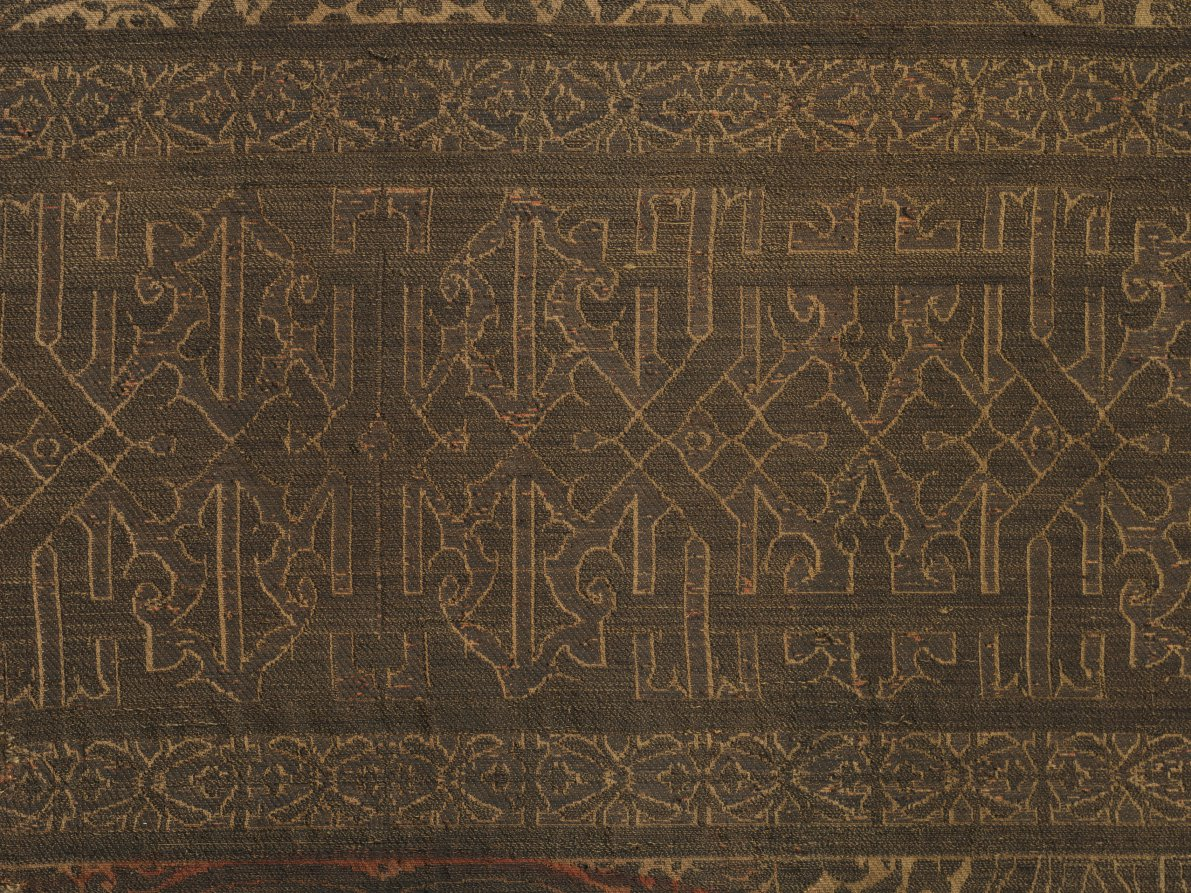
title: Cloth of gold with felines and eagles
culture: Northeast Iran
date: 1225–75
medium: Silk and gold thread: lampas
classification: Textile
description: Mongol taste for luxury was equated with gold, symbol of imperial authority, power, and legitimacy. This splendid cloth of gold-exceptionally large and luxurious-may have enriched the interior of a palace or a majestic tent. The golden pattern, although tarnished on the faded red silk ground, features scalloped medallions with felines whose long tails terminate in dragons’ heads amid elegant floral vines. Double-headed eagles form interstitial motifs on the floral ground. A radiant gold-on-gold band of pseudo-Arabic script enriches the top, woven with gold strips wrapped around a silk core on a ground of flat strips of gold, immediately beneath the pattern testing area.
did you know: Mongol cloths of gold, called nasji, incorporate Iranian, Central Asian, and Chinese features, reflecting the effects of gift exchanges and international commerce.